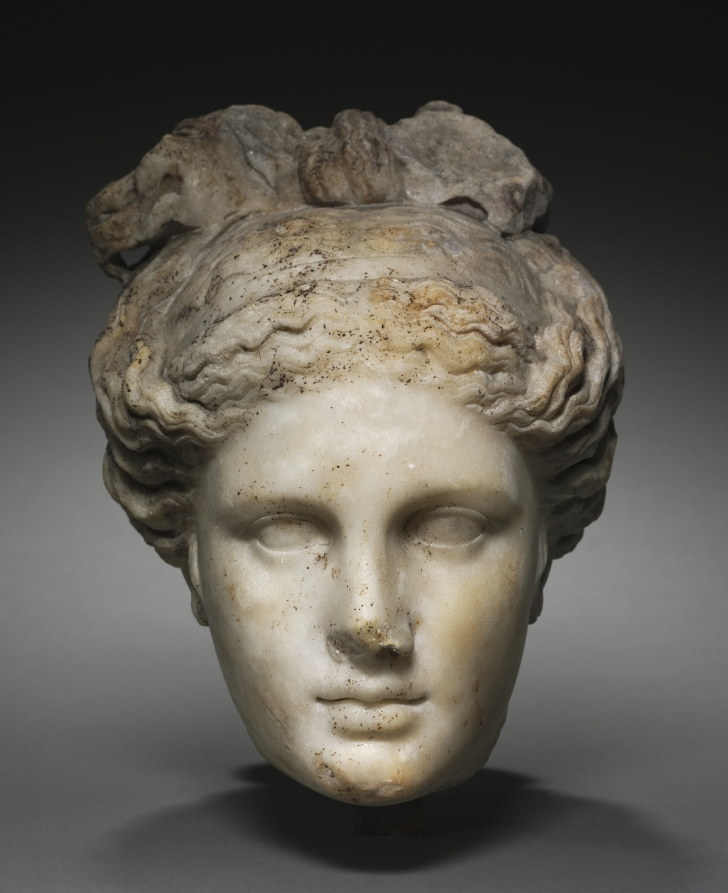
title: Head of Aphrodite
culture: Italy, Roman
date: 100–200 CE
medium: marble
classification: Sculpture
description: With idealized features including a straight nose, small mouth with thick lips, and a hairstyle best known from the so-called Capitoline Venus (now in Rome), this head likely belonged to a full-scale statue of the goddess of love. Like the Capitoline Venus and many other sculptures of the Roman period, it probably showed the goddess nude and bathing, harking back to the groundbreaking sculpture of Aphrodite at Knidos, carved by Praxiteles in the mid-fourth century BC.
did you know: The elaborate hairstyle, arranged in a bow atop the head, identifies this figure as Aphrodite.